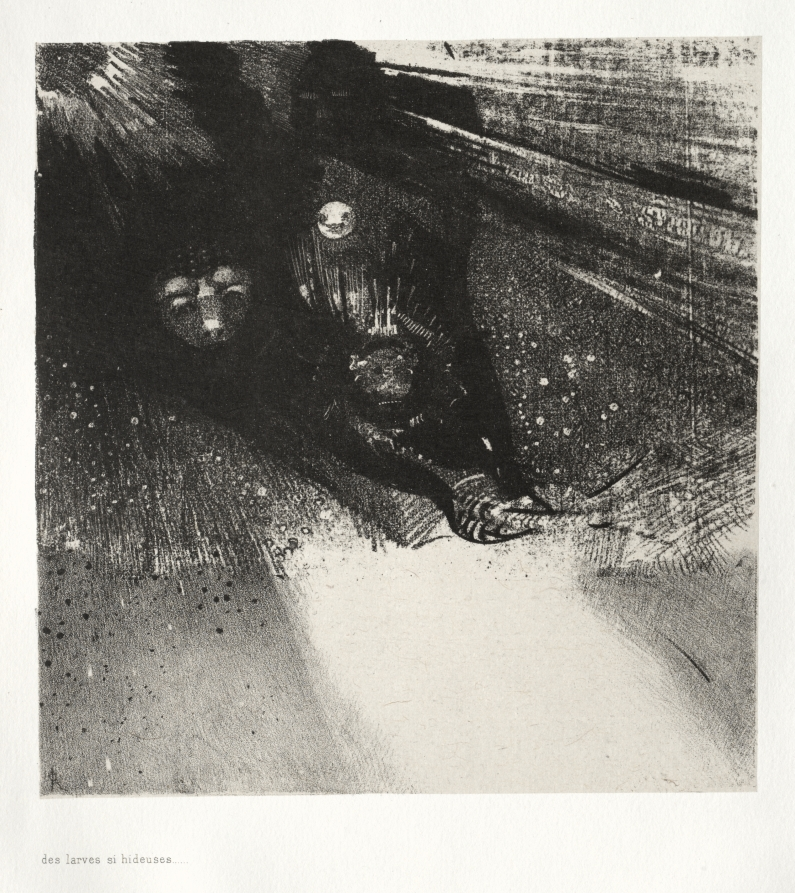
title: Hideous Larvae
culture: France, late 19th Century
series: The Haunted House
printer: Auguste Clot (French, 1858–1936)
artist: Odilon Redon (French, 1840–1916)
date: 1896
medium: lithograph on China paper laid on wove paper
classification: Print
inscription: printed at lower left, below image: des larves si hideuses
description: Odilon Redon was a voracious reader of contemporary literature, and such texts often influenced his art. This series was inspired by The Haunted and the Haunters, an 1859 novel by British writer Edward Bulwer-Lytton. Redon’s prints capture the book’s mysterious tone and emphasis on the supernatural through vague but evocative imagery that sometimes borders on abstraction. By this time a seasoned expert in lithography, the artist collaborated with master printer Auguste Clot. Their combined technical skills allowed for the rich tonal variation seen here, made by turning Redon’s lithographic crayon on its side, layering various marks, and even scratching directly into the surface of his stone.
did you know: One of Redon's greatest patrons, the occultist René Philipon, commissioned this portfolio as a supplement for his French translation of Bulwer-Lytton's The Haunted and the Haunters.